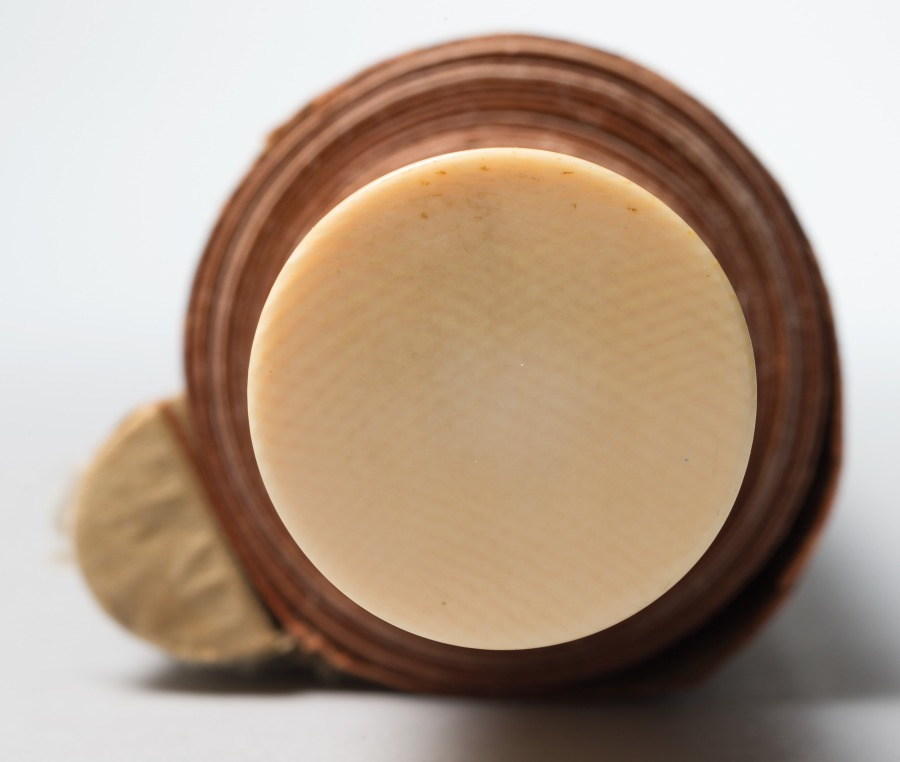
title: The Crossing of the Yangzi River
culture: China, Qing dynasty (1644-1911)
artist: Shang Rui (Chinese, 1634?-)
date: c. 1700–1720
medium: hanging scroll, ink and slight color on paper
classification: Painting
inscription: Colophons: One upper left inscription by the artist followed by two seals; one upper right inscription followed by two seals; three other seals, one in lower left